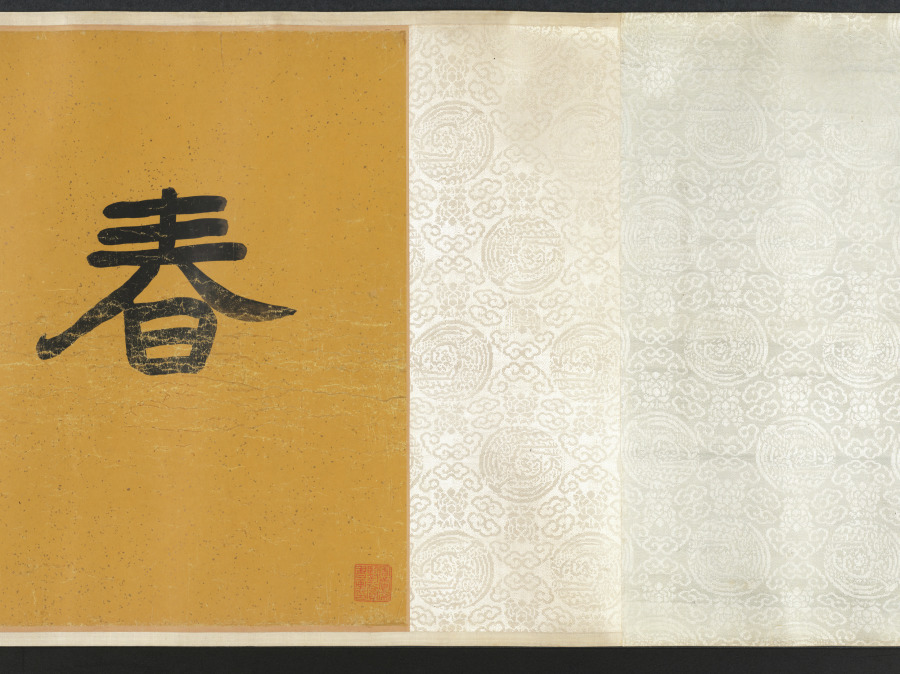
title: Cleansing Medicinal Herbs in the Stream on a Spring Day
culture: China, Qing dynasty (1644-1911)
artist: Yu Zhiding (Chinese, 1647–c. 1716)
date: 1703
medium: Handscroll; ink and color on silk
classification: Painting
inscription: Title by Chen Yixi.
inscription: 姑射仙人冰雪膚，新詩傳唱滿通都。/ 極知遲暮難為別，更展春泉洗藥圖。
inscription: Colophon by Chen Tingjing 陳廷敬 (1639–1712). Colophon by Wang Hongxu 王鴻緒 (1645–1723), dated 1707. Colophon by Song Luo 宋犖 (1634–1714). Colophon by Liu Yan 劉巗. Colophon by Jing Xikui 涇西夔. Colophon by Liu Yan 劉巗. Colophon by Cao Yin 曹寅. Colophon by Wang Shihong 汪士鋐. Colophon by Wang Shidan 王式丹 (1645–1718), dated 1712. Colophon by Shi Shenyi 史申義 (1661–1712), dated 1712. Colophon by Yin Yuqing 殷餘慶, dated 1712.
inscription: Colophon by Chen Shixia 陳時夏, dated 1729.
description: A famous portraitist, Yu Zhiding here depicts the likeness of Shi Shenyi 史申義 (1661–1712), an official and poet. Master Shi, a sickly man, was deeply interested in medicinal science. The opening section of the scroll features a boy washing a fungus in fresh spring water, a basket of medicinal herbs by his side. Other servants carry a fan, a bundle of scrolls, and a cup of tea or hot wine. Master Shi sits in a bamboo grove, surrounded by fields of herbs. Returning swallows, pink peach blossoms, and blooming magnolia indicate spring, whereas the fungus conveys wishes for long life. The spring theme may express the artist’s wish for his friend’s recovery.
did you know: In the pavilion are some of Shi Shenyi’s scholarly accoutrements: a stack of books, an antique zun 尊 (wine vessel), a brush holder, an ink stone, and a small chime.